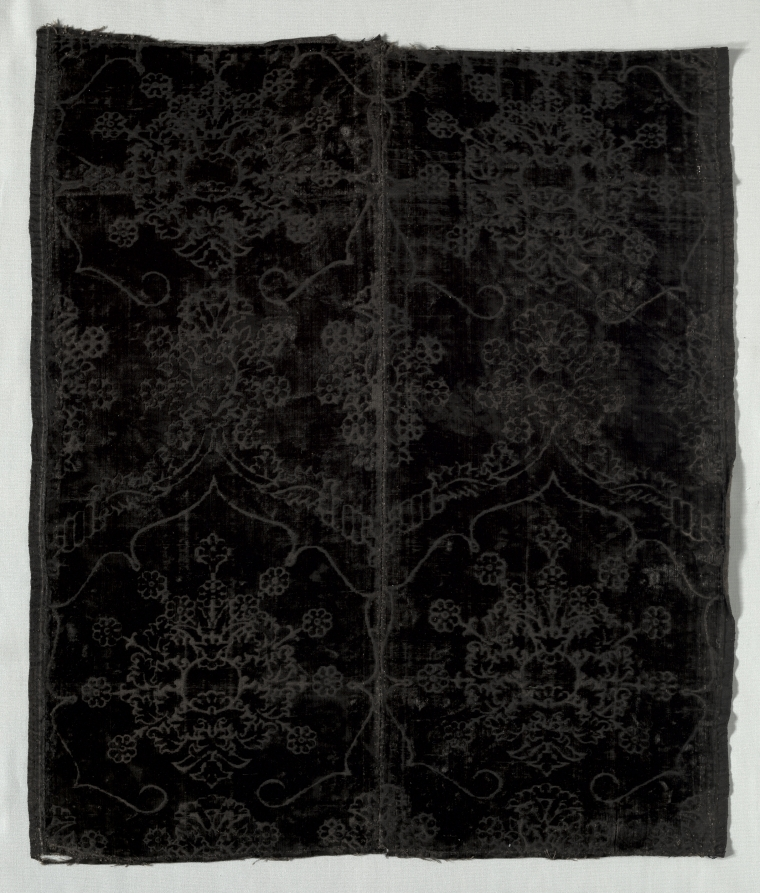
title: Velvet Fragment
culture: Italy, 15th century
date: 1400s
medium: velvet weave (cut and voided): silk thread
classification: Velvet